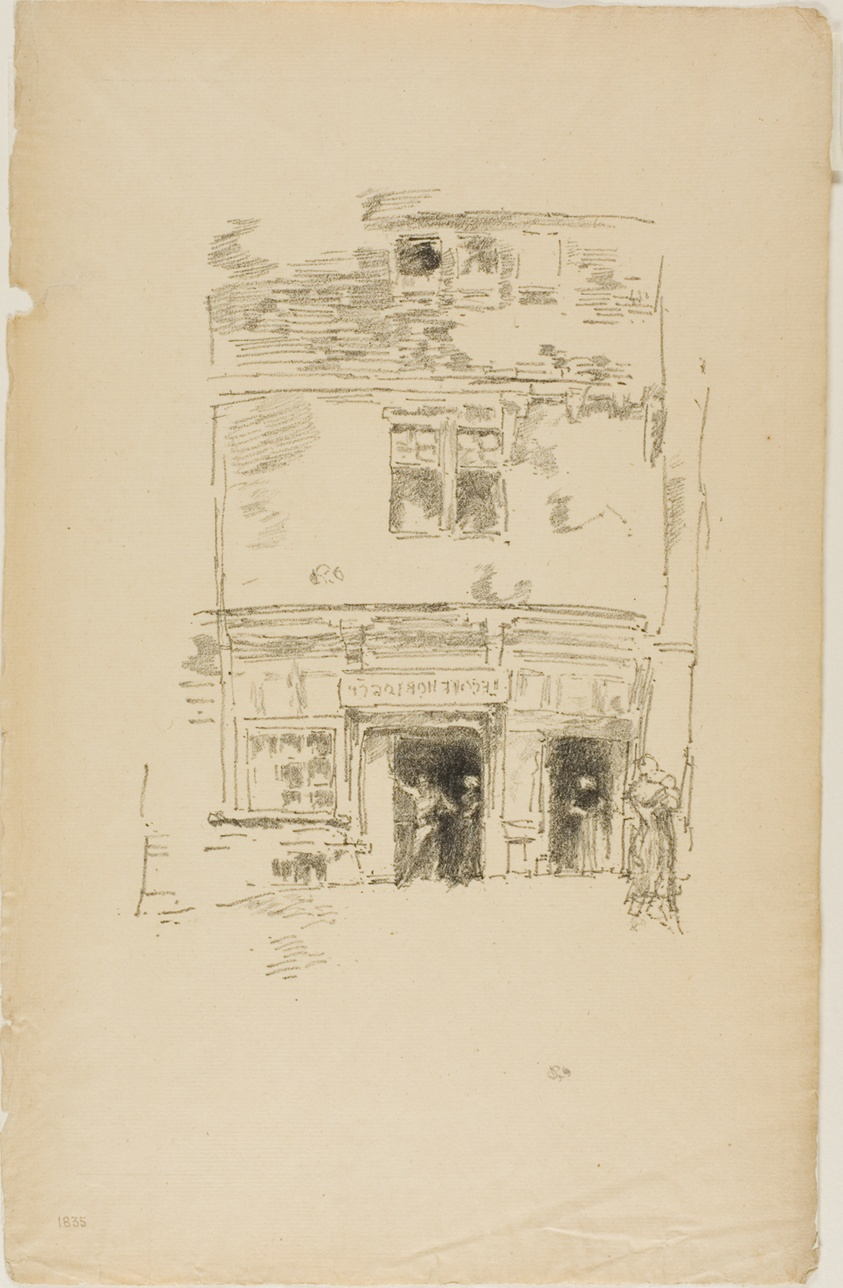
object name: Print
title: The Clock-Makers, Paimpol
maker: James McNeill Whistler (American, 1834-1903)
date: 1893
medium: Transfer lithograph in black on cream laid paper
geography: United States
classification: transfer lithograph; lithograph; print; prints and drawing; paper